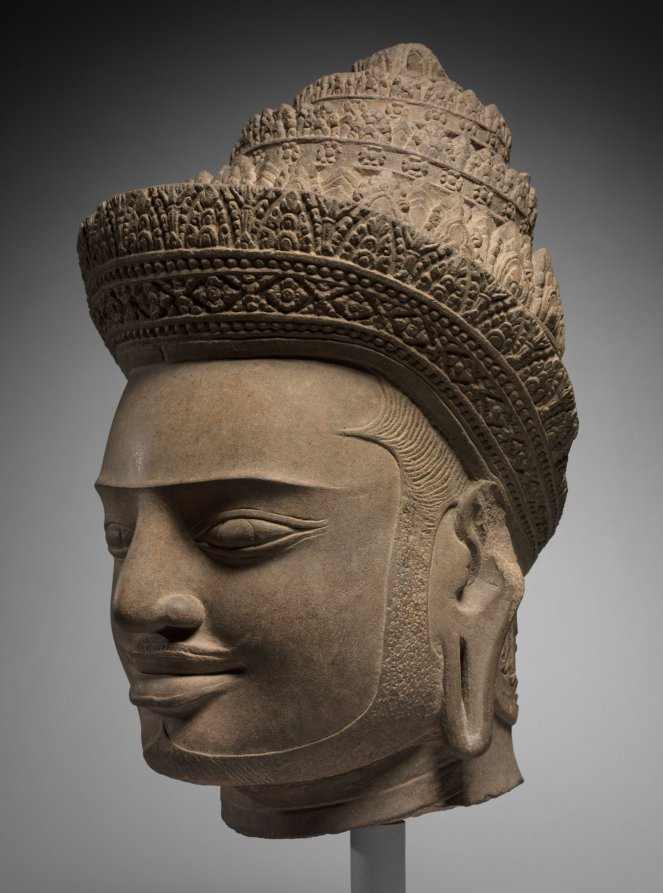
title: Head of a Deity or a Deified King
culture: Cambodia, Koh Ker, Reign of Jayavarman IV, 928-941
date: mid-900s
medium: sandstone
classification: Sculpture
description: The diadem is depicted tied to the intricate tiered headdress worn only by a god or king. Without further attributes, the identity cannot be known. Khmer sculptors of the 10th century emphasized powerful forms and extroverted expressions. The incised pupils suggest that this sculpture underwent the ritual of awakening, in which the eyes were added last. The royal head on the left is from a temple dedicated to Shiva, which was established by the Khmer king Jayavarman IV (928–942) in his remote capital of Koh Ker, 100 miles north of Angkor.